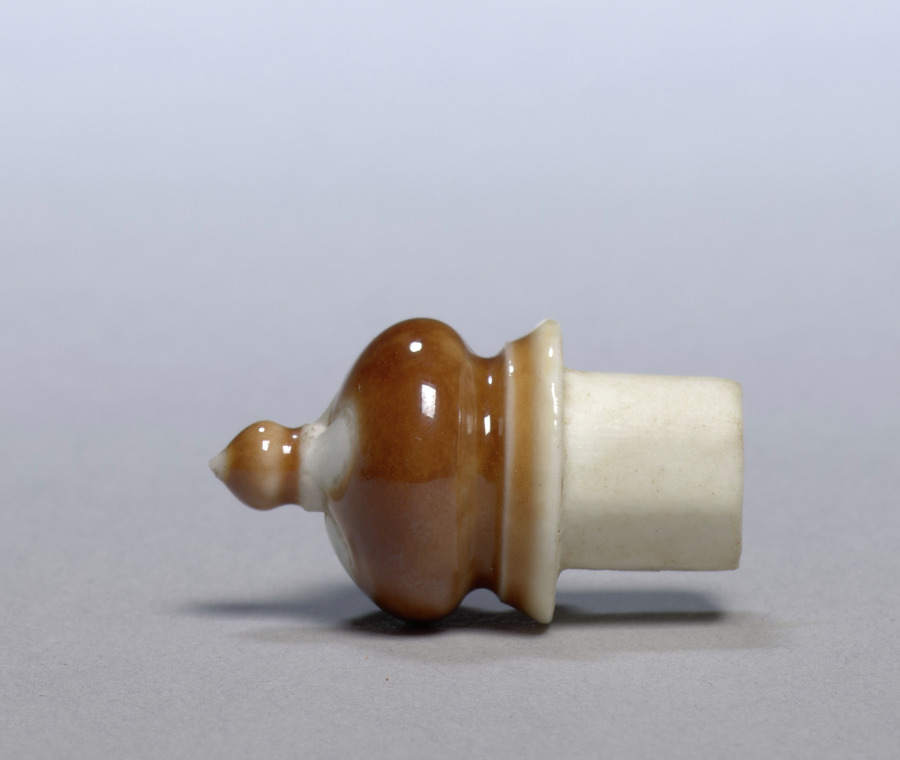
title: Cover for a Vase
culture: France, 20th century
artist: Sèvres Porcelain Factory (French, est. 1756)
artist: Taxile Maximin Doat (French, 1851–1939)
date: 1901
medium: porcelain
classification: Ceramic